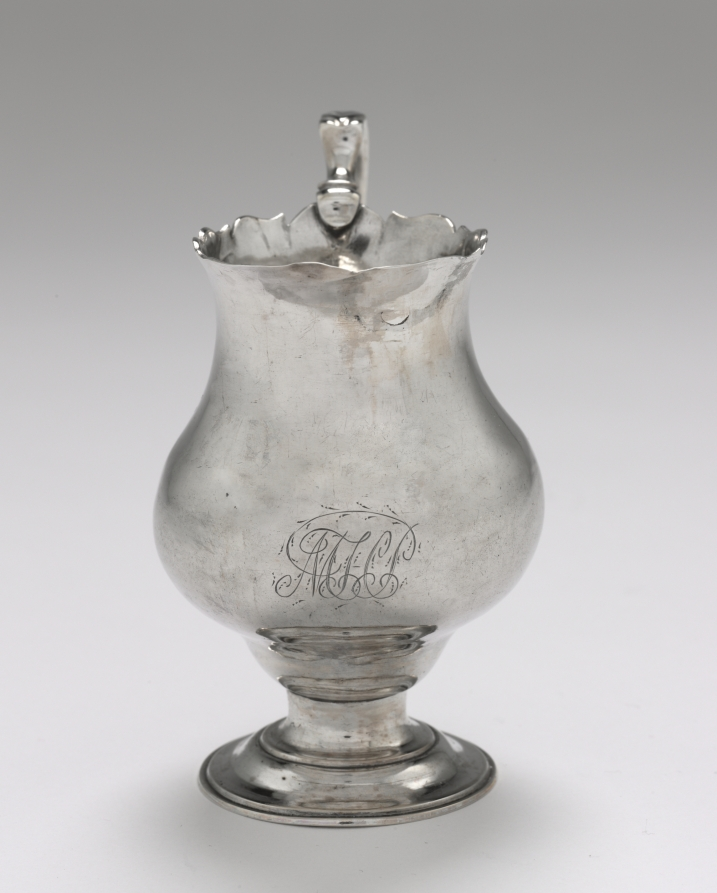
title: Cream Pitcher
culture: America, Massachusetts, Boston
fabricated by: Paul Revere II (American, 1735–1818)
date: c. 1765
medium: silver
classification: Silver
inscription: "P . . .H/to/P . . .E" in block letters under foot, and "MHP" in bright-cut script on front, opposite handle.